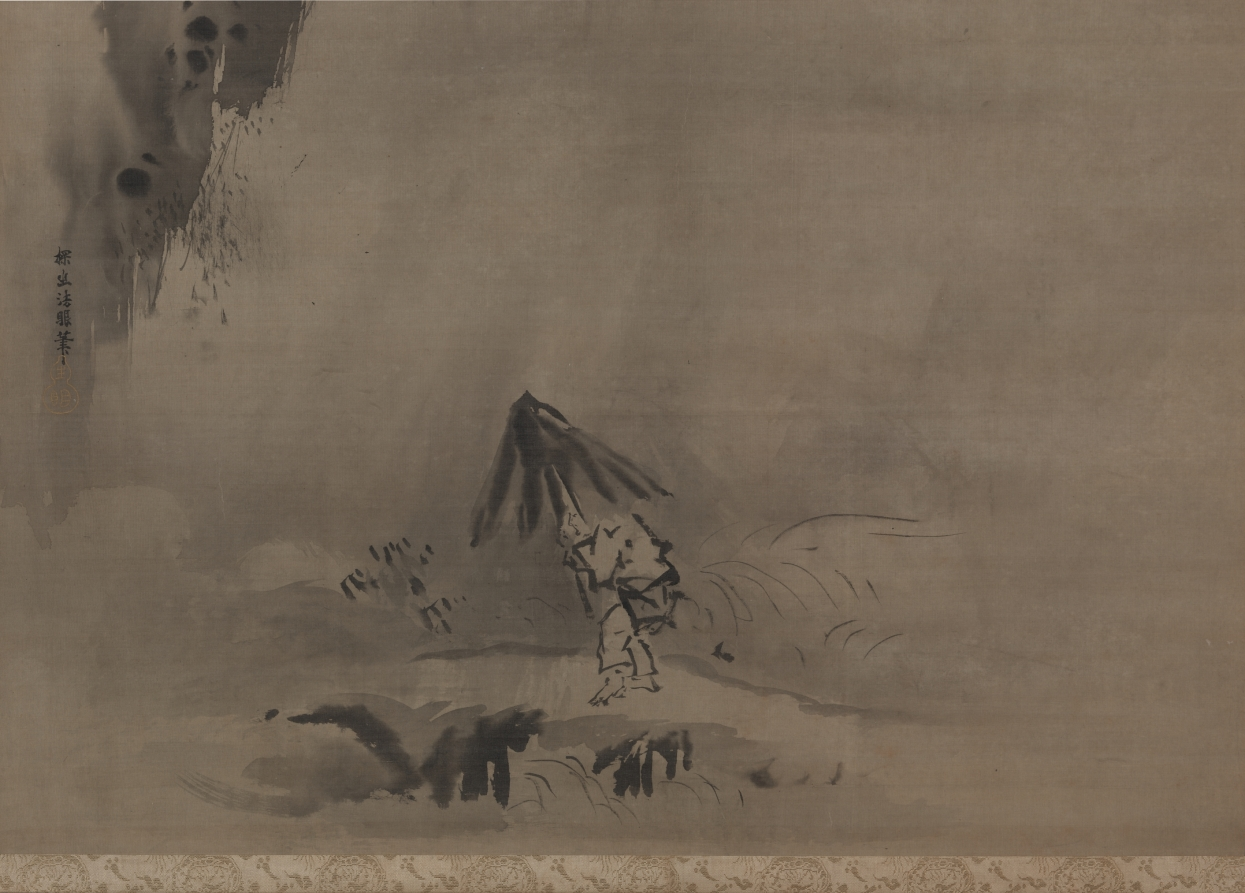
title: Evening Shower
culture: Japan, Edo period (1615–1868)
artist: Kano Tan’yū (Japanese, 1602–1674)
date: c. 1625–74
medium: hanging scroll; ink on silk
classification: Painting